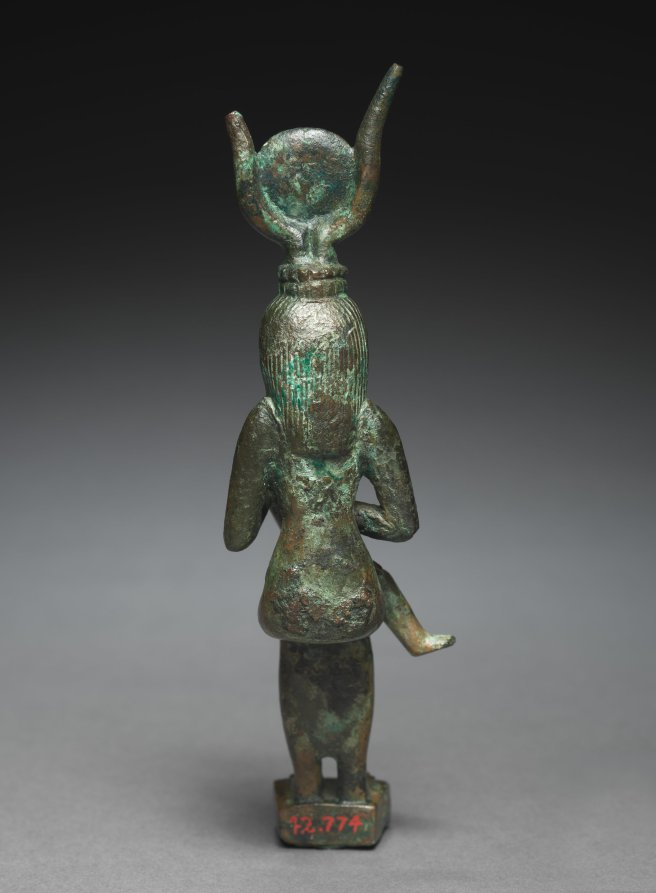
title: Statutette of Isis and Horus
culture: Egypt, Greco-Roman period (332 BCE–395 CE), Ptolemaic dynasty (305–30 BCE)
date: 305–30 BCE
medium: bronze, solid cast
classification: Sculpture